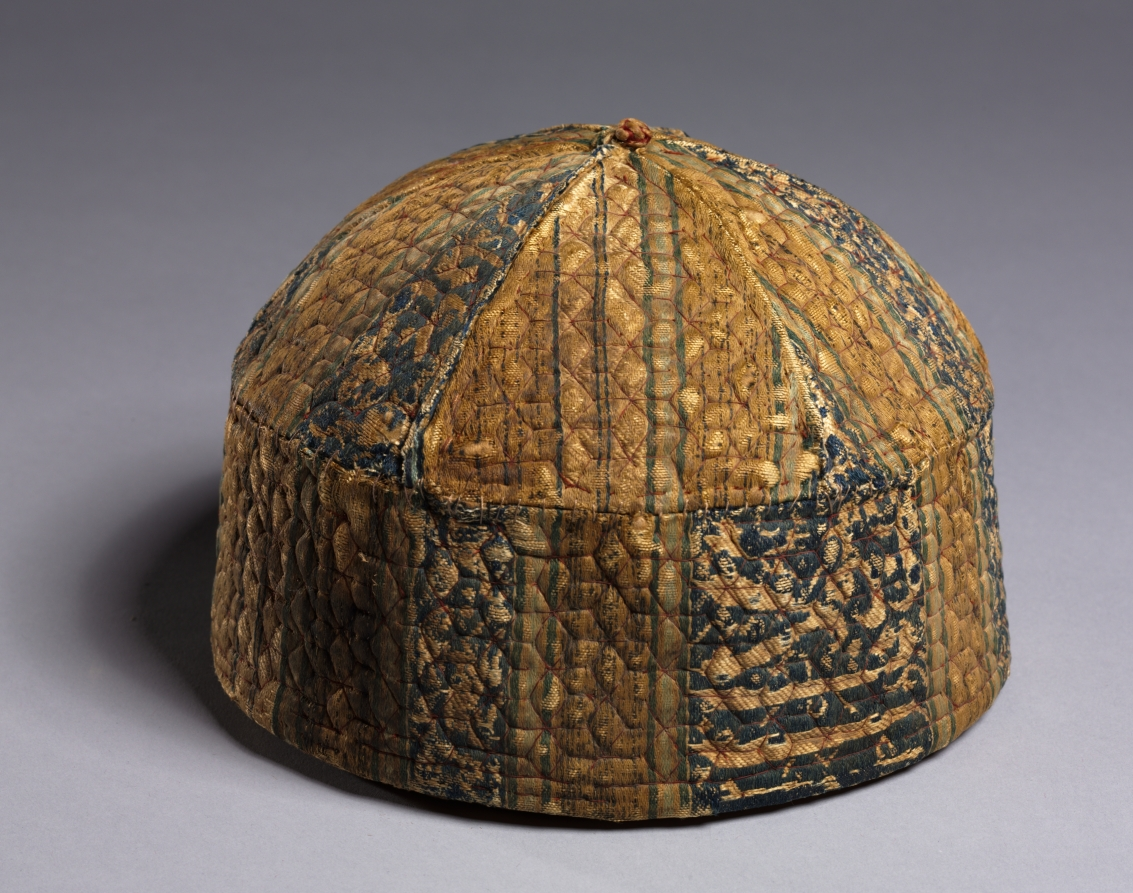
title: Cap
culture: Syria or Egypt, Mamluk Dynasty (1250–1517)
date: 1300s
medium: lampas, quilted: silk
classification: Textile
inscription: 1) Glory to our Lord, the Sultan 2) Glory to our Lord, the Sultan al-Malik, al-Nasir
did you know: The winter-weight quilted cap was part of a set with a matching quilted vest.